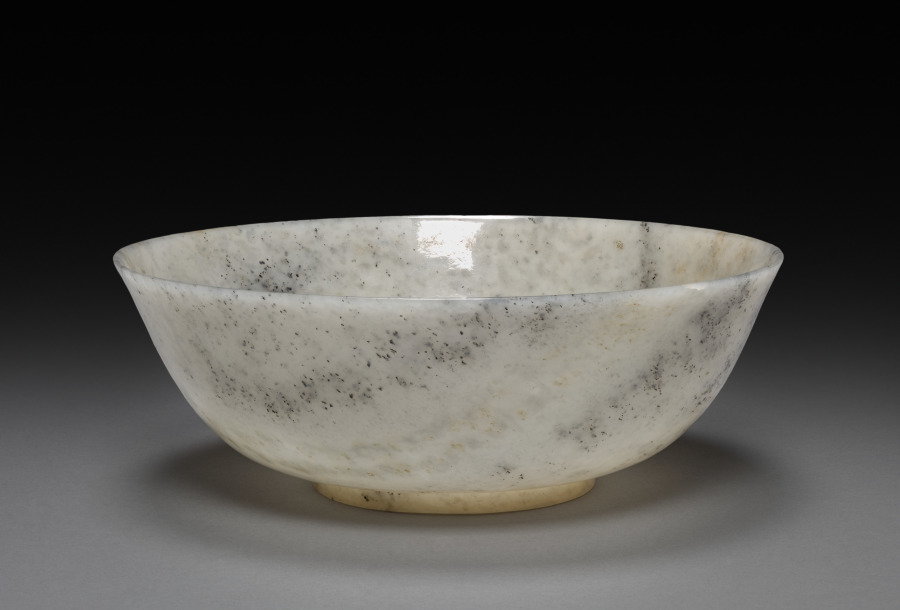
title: Bowl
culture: China, Qing dynasty (1644-1911), Qianlong mark and reign (1736-95)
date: 1736–95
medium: jade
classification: Jade